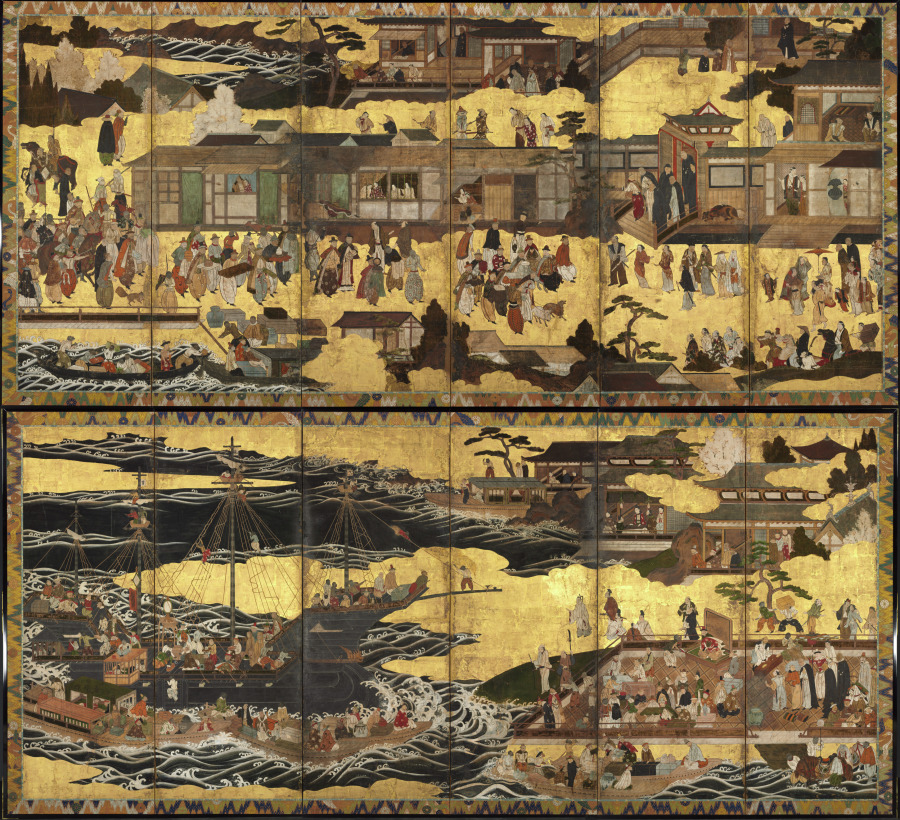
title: Arrival of the "Southern Barbarians"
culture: Japan, Momoyama period (1573–1615)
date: c. 1600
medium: Pair of six-panel folding screens; ink, color, and gold on paper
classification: Painting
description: These screens show European merchants arriving in Japan. Almost certainly the persons represented are Portuguese, since they are accompanied by Roman Catholic priests. Early in the 1600s the Portuguese were forced out of Japan, chiefly because of internal difficulties caused by their missionaries. Later, between 1641 and 1853, the Dutch were the only Europeans permitted to trade with Japan but their presence was restricted to a port town in far western Japan, near present-day Nagasaki.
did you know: Europeans were called "Southern Barbarians" because their ships arrived in Japan from the south.